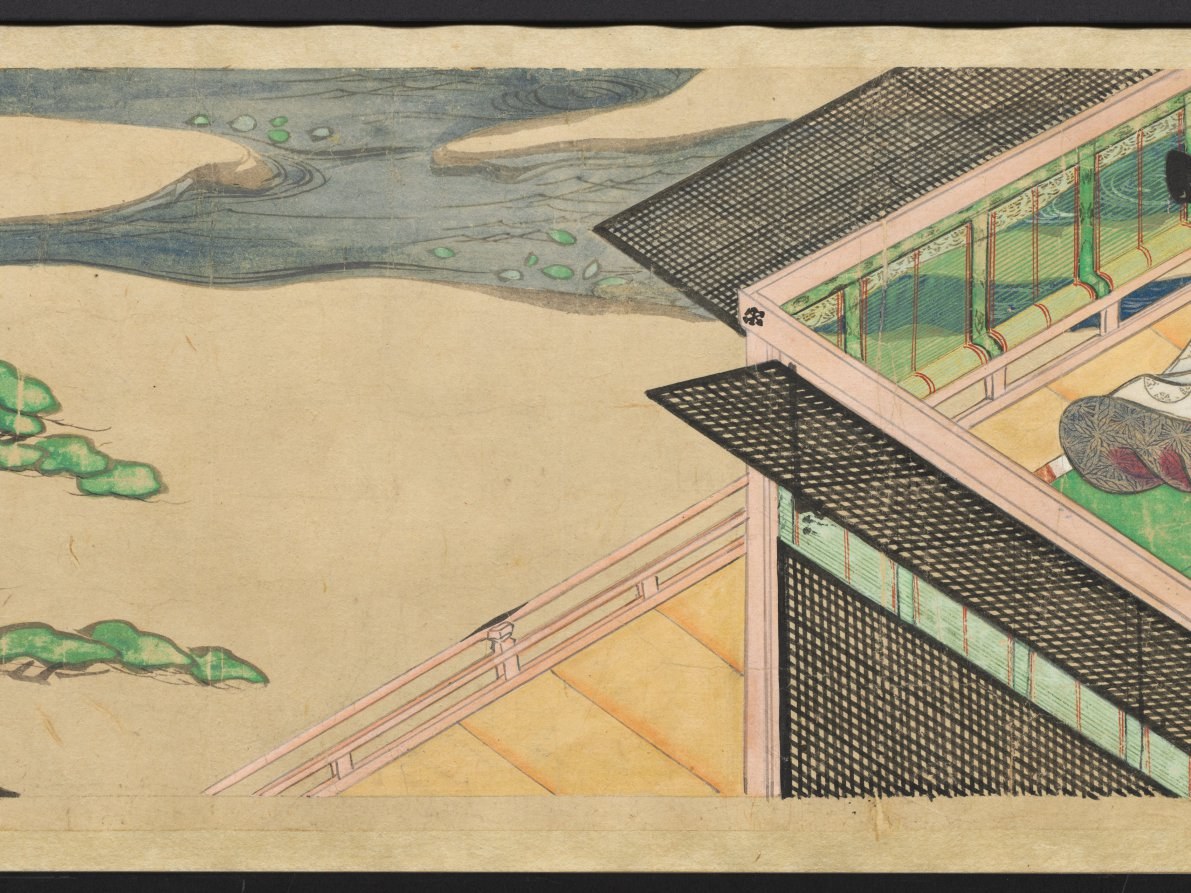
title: The Saltmaker's Story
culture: Japan, Edo period (1615–1868)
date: early 1600s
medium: One of a pair of handscrolls; ink, color, and gold on paper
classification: Painting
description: Once read and copied by girls at New Year’s celebrations and included in dowries, The Saltmaker’s Story is a rags-to-riches tale in which daughters are gifts from the gods. Despite his simple outlook, the main character progresses from humble roots as an associate at Kashima Shrine to the elite status of grandfather of the emperor through the intervention of the Kashima deity. The Saltmaker’s Story is traditionally presented in a set of three scrolls, but the text of this set has been removed by a previous owner, who remounted the illustrations as a pair. The paintings of this one take us from right to left through the first half of the tale.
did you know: This handscroll originally had texts before its paintings, but the texts were removed.